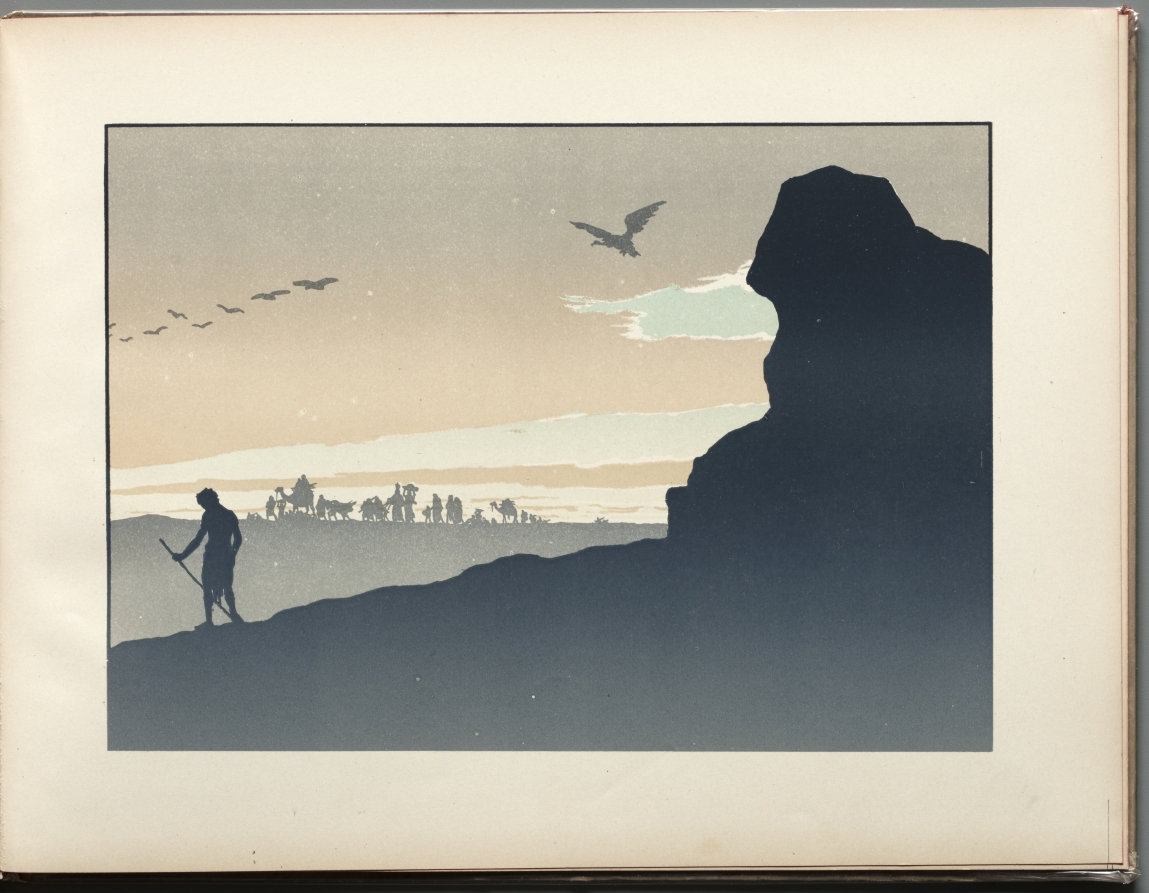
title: The Prodigal Son: page 37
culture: France, 19th century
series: Bound Volume illustrating the poetry and music of Georges Fragerolle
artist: Henri Rivière (French, 1864–1951)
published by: E. Flammarion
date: 1895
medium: 15 color lithographs in a bound volume illustrating the poetry and music of Georges Fragerolle: color lithograph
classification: Bound Volume